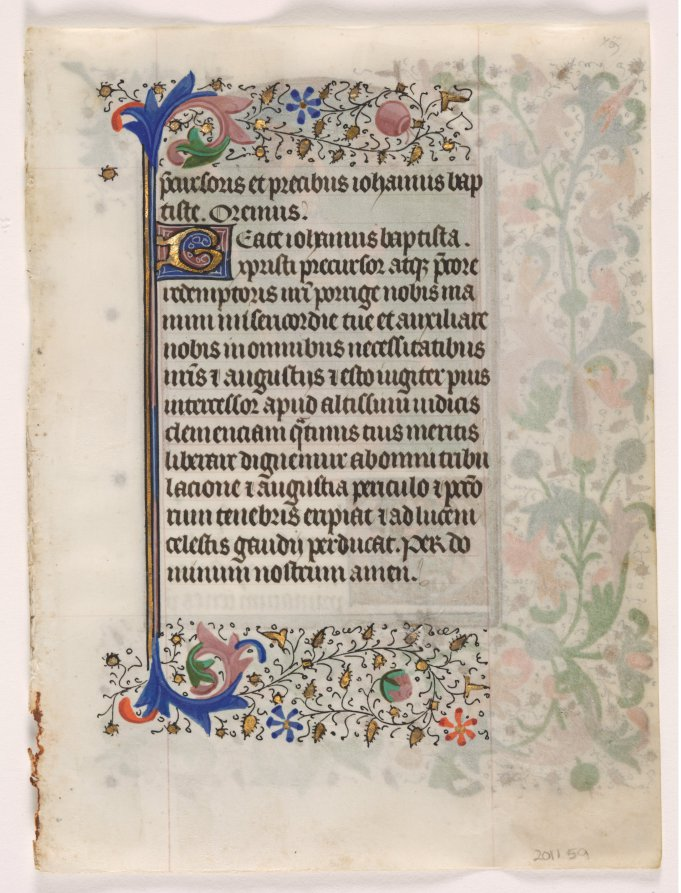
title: Leaf from a Book of Hours: Saint James the Greater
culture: Flanders, Bruges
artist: Master of the Gold Scrolls (Belgian)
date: c. 1440–1450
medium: ink, tempera and gold on vellum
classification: Manuscript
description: The illuminator of this leaf is one of a group of painters and workshops collectively known as the "Masters of the Gold Scrolls," named after the gold tendrils that frequently, but not always, occupy the backgrounds of the group’s compositions. The present miniature is by one of the Gold Scrolls’ finest hands. From the 1440s onward, the gold scroll motif begins to disappear in their miniatures and replaced, as here, by landscape. Saint James the Greater is shown as a Christian pilgrim. The miniature would have appeared in the Suffrages of the book of hours.